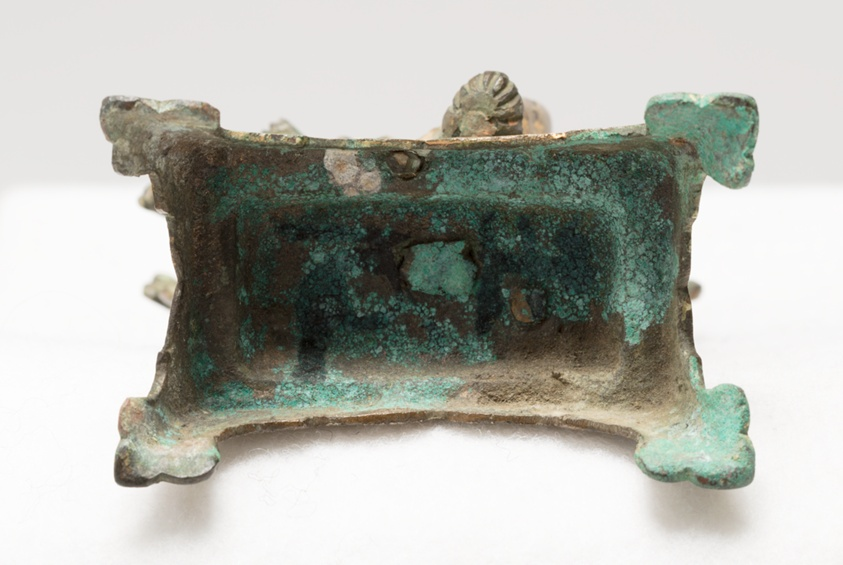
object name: Sculpture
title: South Sea Guanyin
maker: China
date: Song dynasty (960–1279)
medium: Gilt bronze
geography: China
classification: sculpture